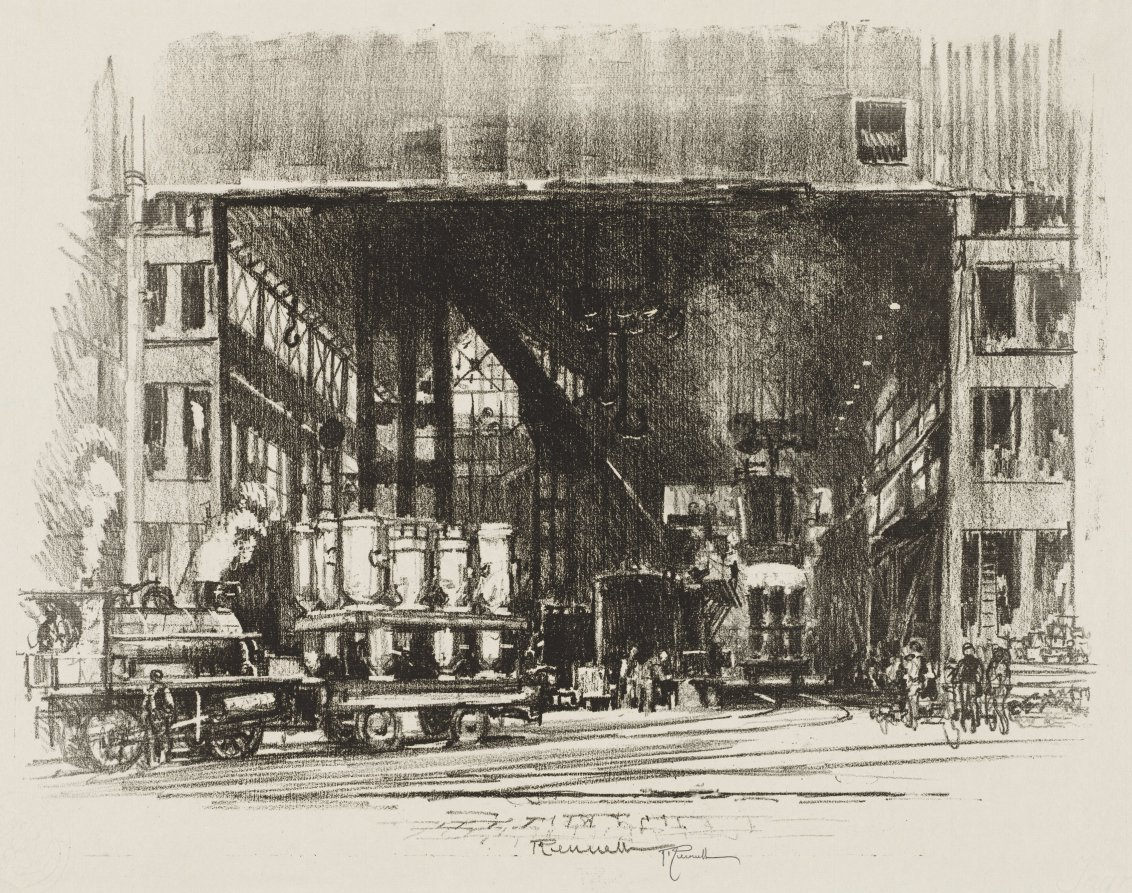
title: English War Work: The Urns, Casting Big Shells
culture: America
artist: Joseph Pennell (American, 1857–1926)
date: 1916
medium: lithograph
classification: Print